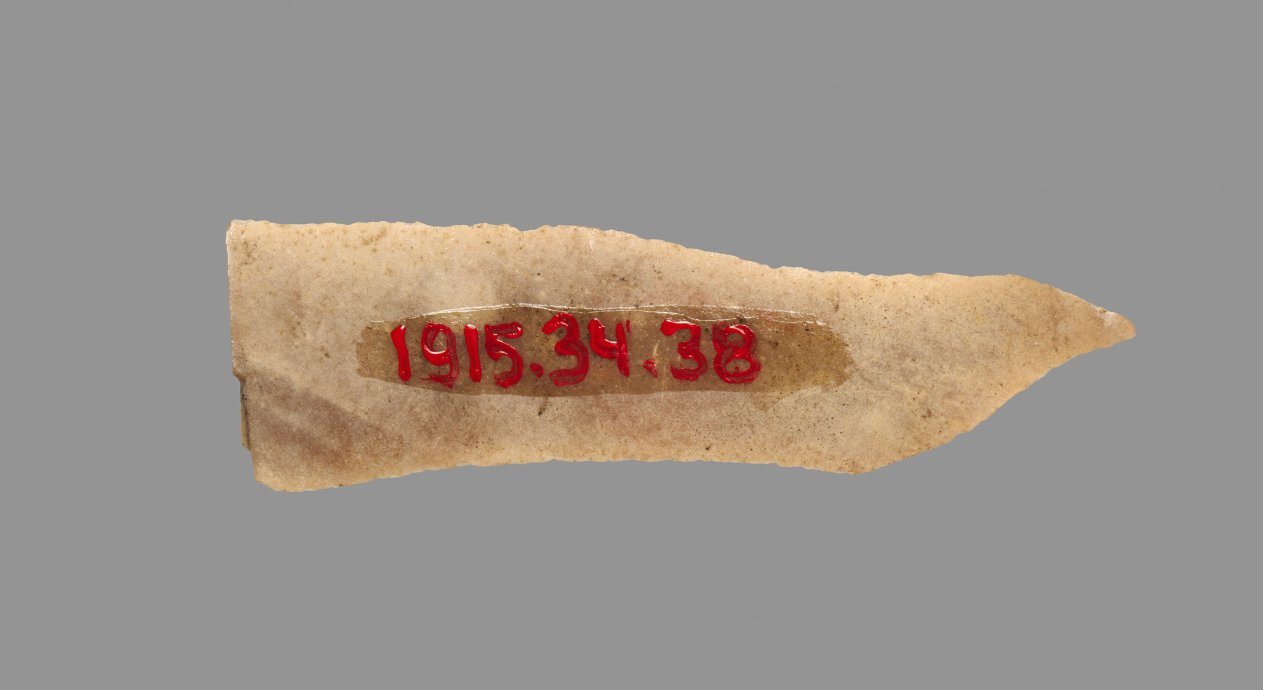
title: Sickle Blade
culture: Egypt, Middle Kingdom (2040–1648 BCE), Dynasty 12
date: 1980–1801 BCE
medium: flint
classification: Implements